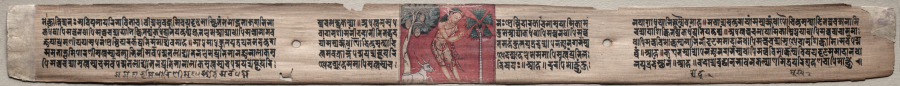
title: Sudhana and a buffalo, folio 115 (recto) from a Gandavyuha-sutra (Scripture of the Supreme Array)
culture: Nepal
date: 1000–1100s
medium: gum tempera and ink on palm leaf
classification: Painting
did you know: The palm leaves used to create manuscripts were harvested from the Talipot Palm, seen on the right.